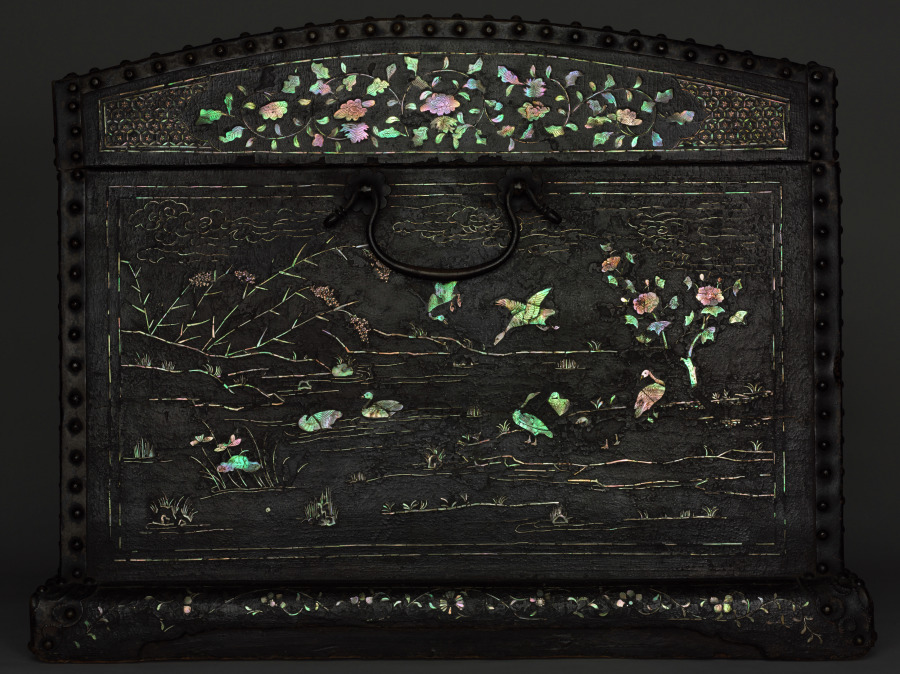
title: Chest for Storing Garments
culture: China, Ming dynasty (1368–1644)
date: 1400s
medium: lacquered wood with mother-of-pearl inlay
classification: Lacquer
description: This precious lacquer box is decorated with bird and plant motifs and figures in mother-of-pearl inlay. The decoration depicts the leisurely pursuit of scholars in nature and a garden setting. Scholars play the board game weiqi, have philosophical conversations, pluck a qin (a zither-like instrument with strings), and read books. Lacquer chests of this type were used to store garments neatly folded along their straight seams. The mother-of-pearl inlay from shells is a technique that was typically practiced by craftsmen in Hangzhou and other parts of southeast China near the sea.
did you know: Lacquer chests of this type were used to store garments.